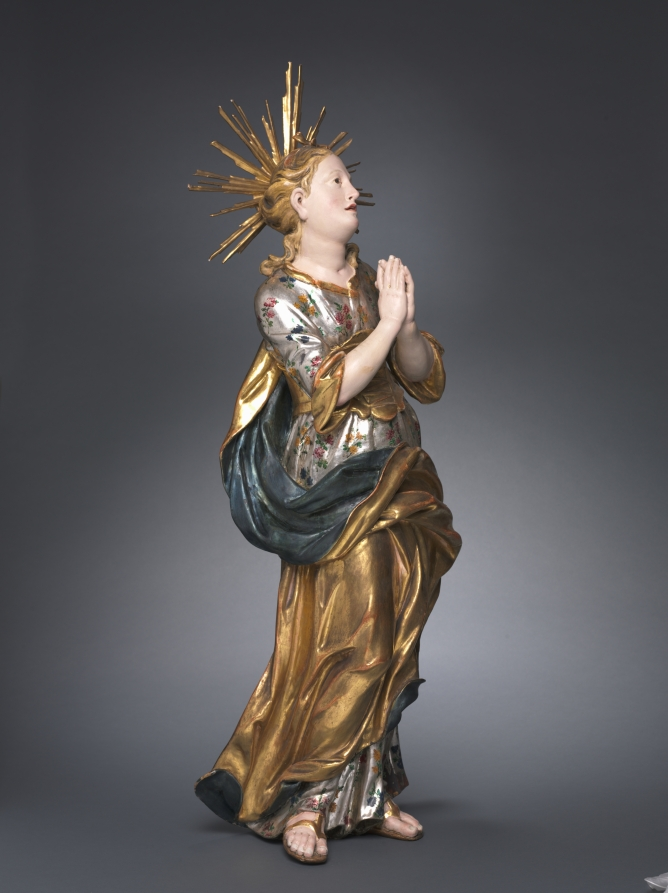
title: Virgin Mary as a Child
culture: Austria, Vienna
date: 1750–75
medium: painted and gilded wood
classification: Sculpture